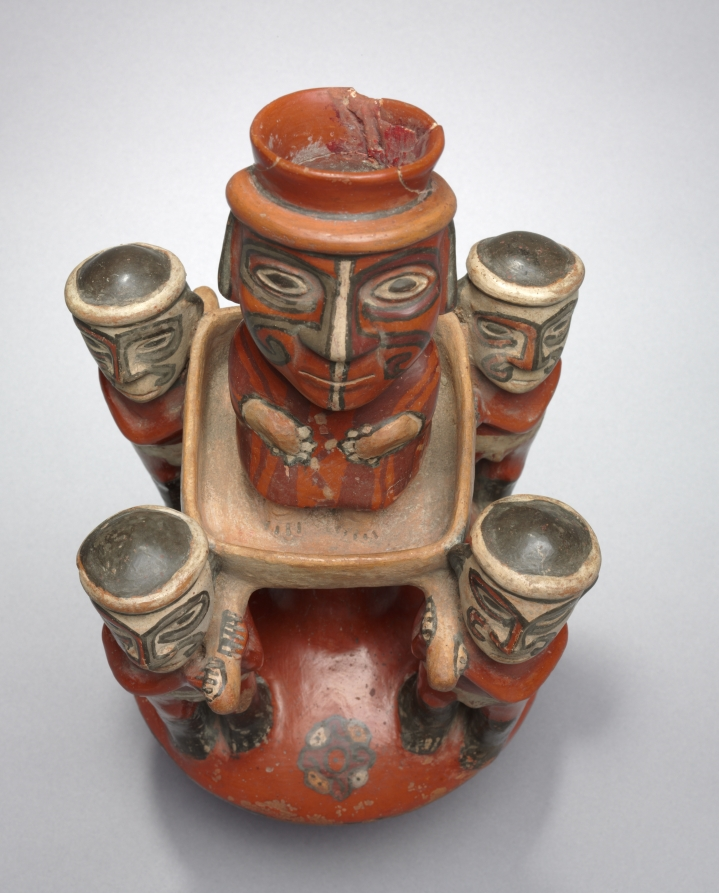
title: Vessel with Litter Group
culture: Central Andes, central highlands, reportedly Wari Wilka, Wari style, 6th-10th century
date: 600–1000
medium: ceramic and slip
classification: Ceramic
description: The sculptural scene atop this vessel's chamber depicts four porters who carry a dignitary in a litter, a high-status mode of transport. Reportedly found at Wari Wilka, a highland water shrine, the vessel empties via a long channel that passes through the body of the dignitary.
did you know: Litters were a mode of transportation reserved for people of high social status.